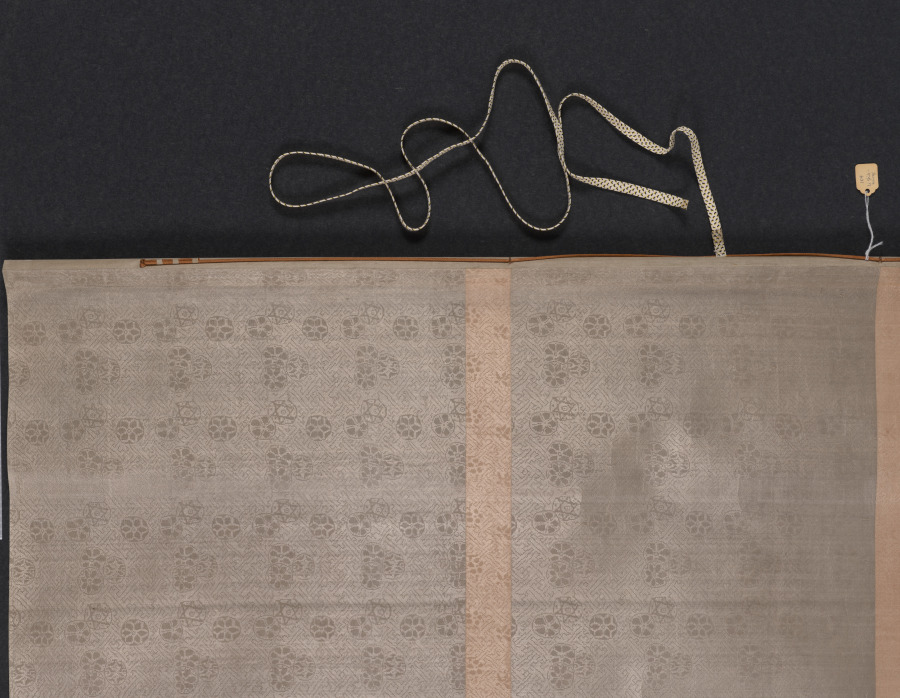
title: Old Trees by a Cool Spring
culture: China, Yuan dynasty (1271-1368)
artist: Li Shixing (Chinese, 1283–1328)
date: 1326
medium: hanging scroll; ink on silk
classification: Painting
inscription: 泰定丙寅年冬十二月薊丘李士行遵道作。[印] 李士行印; 李氏遵道; 遊戲翰墨.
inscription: 薊丘李侯能畫松，蟠根錯節騰蛟龍。 枯梢削鐵歲月古，細葉當風紫翠重。 昔人曾入子固夢，此株豈為秦官封。 畢宏韋偃偕已矣，請公放筆吾將從。 華溪九十翁沈夢麟書 蘊中上人題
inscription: [印] 明善堂所見書畫印記; [印] 怡親王寶